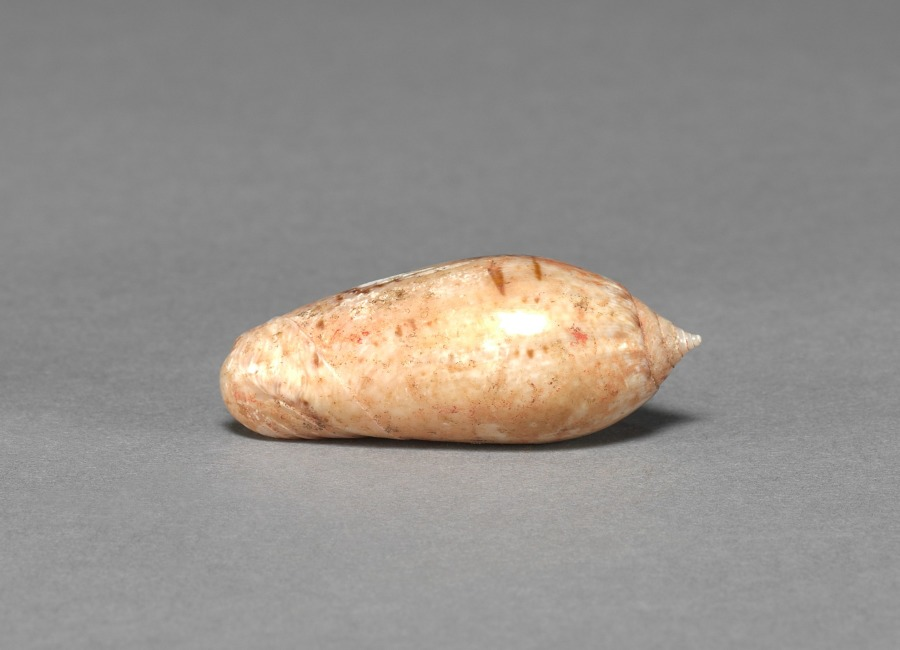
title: Offering Group: Small Shell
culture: Mexico, Guerrero(?), San Jerónimo de Juárez, Xochicalco style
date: c. 800–1200(?)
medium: shell, red pigment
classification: Sculpture